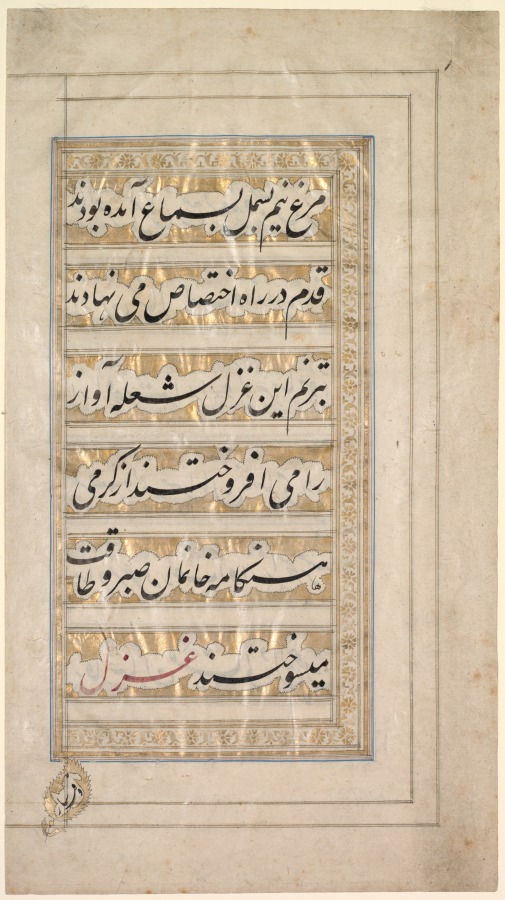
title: Page from the Poem of Beauty and Love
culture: India, Kashmir, Mughal, 19th century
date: 1848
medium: painting on paper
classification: Painting